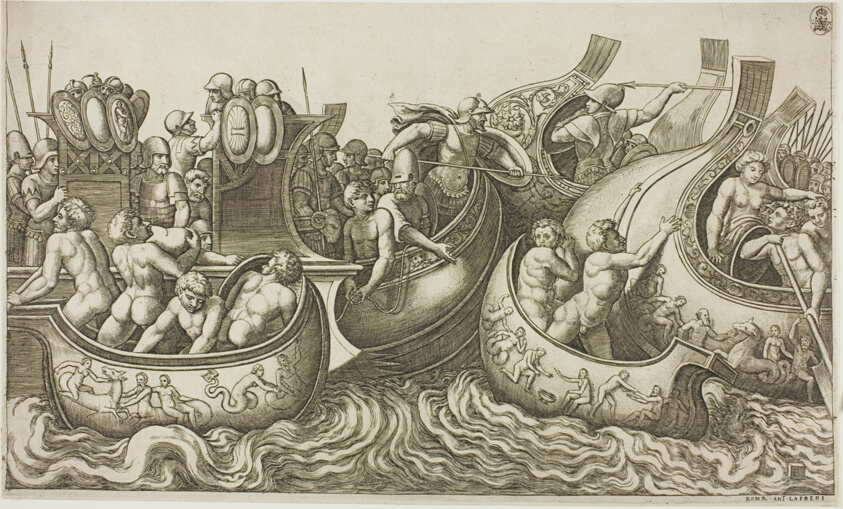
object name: Print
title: Sea Battle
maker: Master of the Die (Italian, active c. 1530-1560)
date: c. 1532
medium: Engraving in black on cream laid paper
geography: Italy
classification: engraving; print; prints and drawing